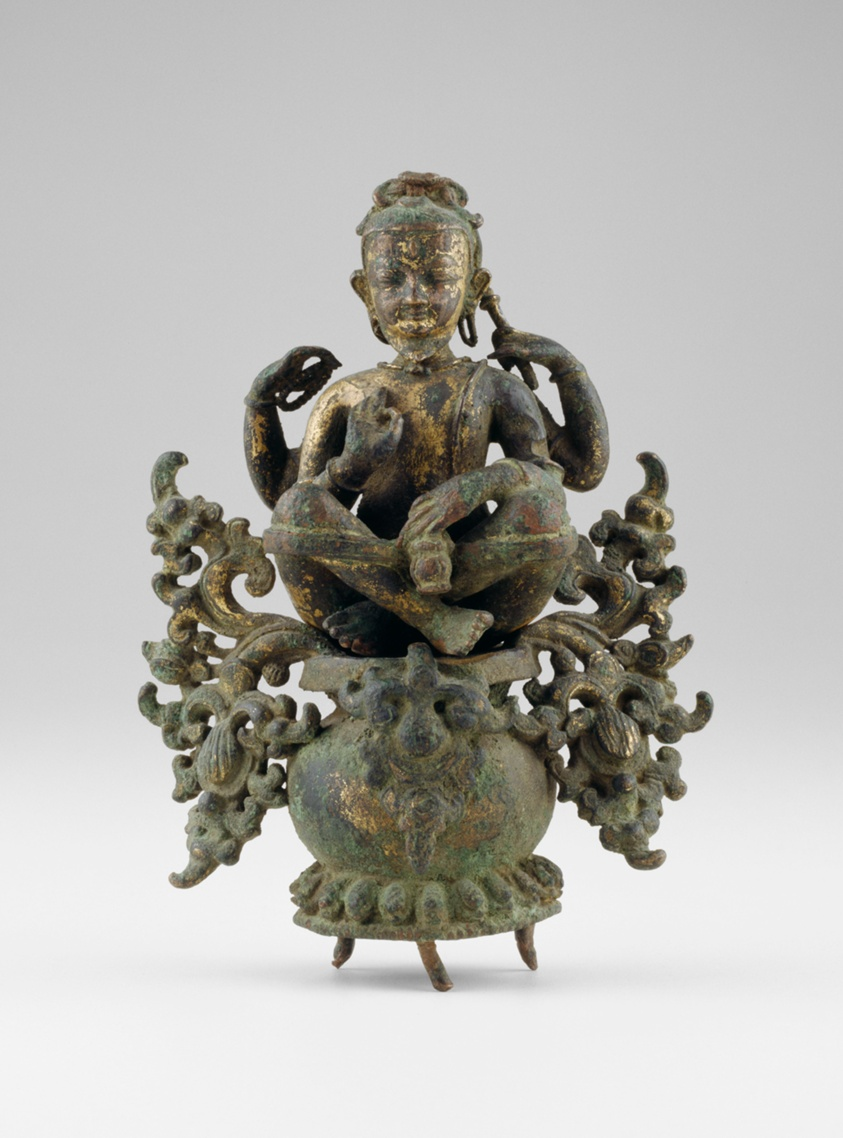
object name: Sculpture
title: The Sage Agastya Seated in Meditation on his Water Pot (Kumbha)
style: Himalayan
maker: Nepal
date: 15th century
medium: Gilt bronze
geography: Nepal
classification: bronze; metal; sculpture; asian art